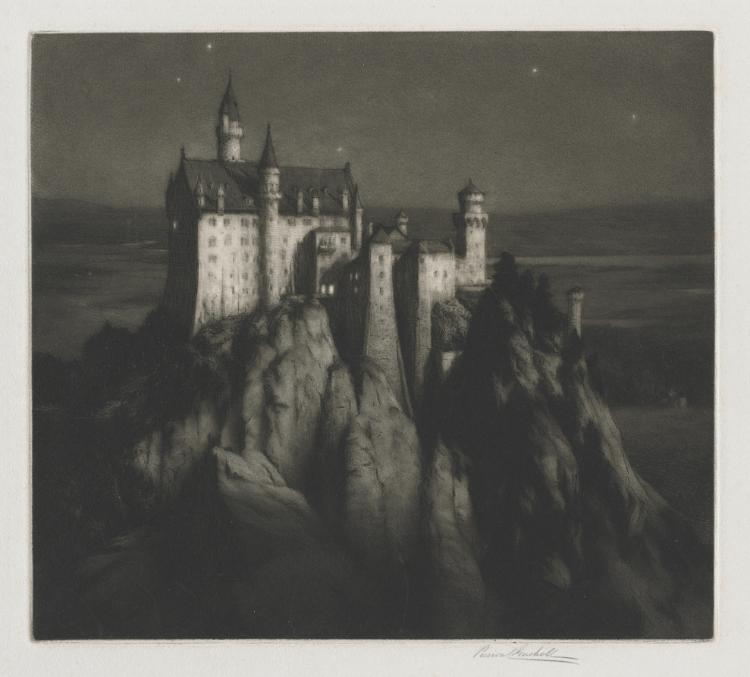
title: Castle Neuschwanstein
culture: England, late 19th-early 20th century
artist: George Percival Gaskell (British, 1868–1934)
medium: mezzotint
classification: Print